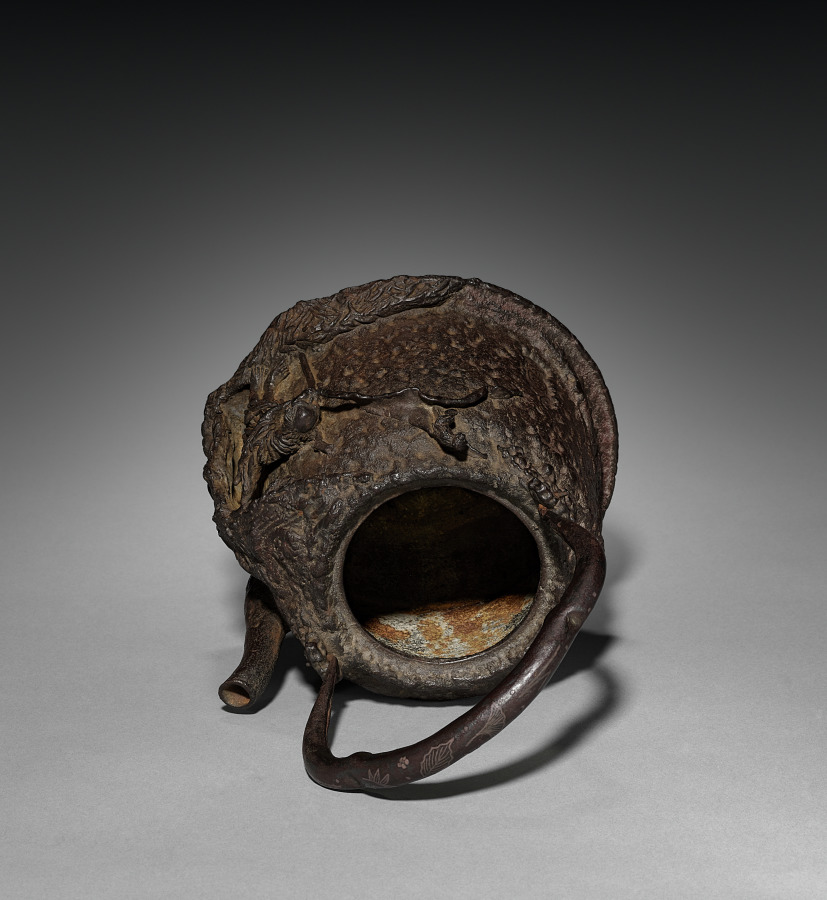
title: Covered Tea Kettle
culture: Japan, Edo period (1615–1868)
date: 1615–1868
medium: iron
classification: Metalwork